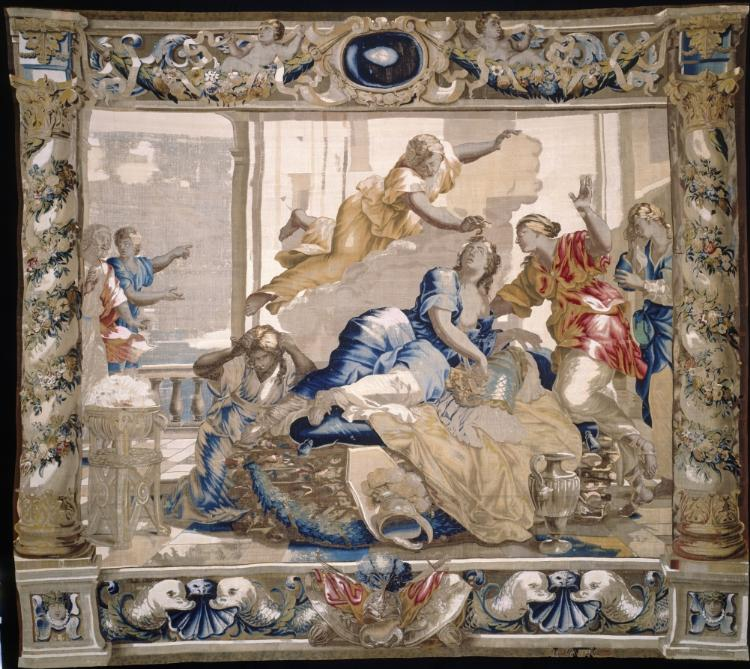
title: The Death of Dido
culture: Belgium, 17th century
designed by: Giovanni Francesco Romanelli (Italian, 1610–1662)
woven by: Michael Wauters (Flemish, 1679)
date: 1679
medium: tapestry weave: silk and wool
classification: Tapestry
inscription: signed lower right: M. Wavters.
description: Driven by despair, and to her sister's dismay, Dido throws herself onto a pyre of Aeneas's bed and clothes and pierces herself with his sword. Moved by pity, Jupiter's wife, Juno, sends Iris from heaven to cut a lock of Dido's hair and sacrifice it to the underworld so that Dido may die. Aeneas's fleet sails away in the distance.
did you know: Depicting the tragic love story of Dido and Aeneas, this tapestry is one of eight gifted to the museum for display in the armor court.